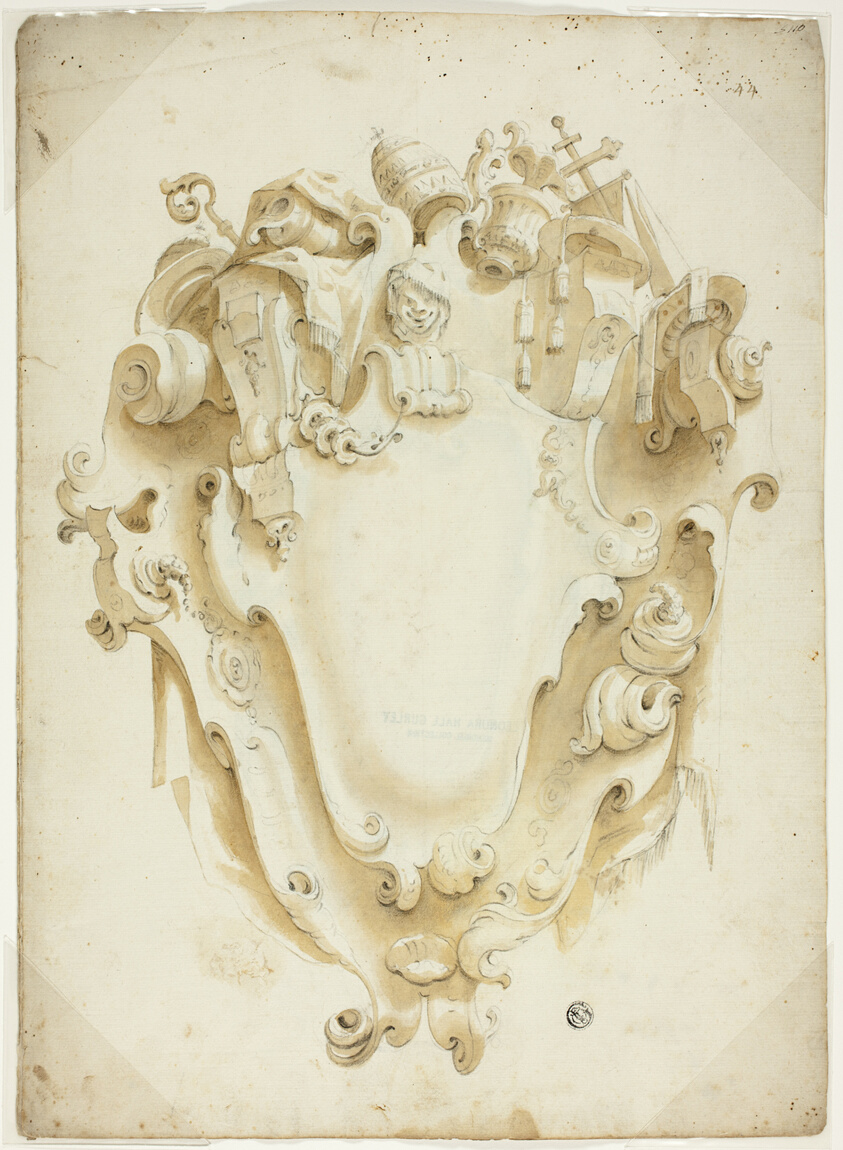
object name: Drawing and Watercolor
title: Design for Ecclesiastical Escutcheon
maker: Unknown Artist; possibly Italian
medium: Black chalk and brush and brown wash on ivory laid paper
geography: Italy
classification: chalk; drawings (visual works); prints and drawing